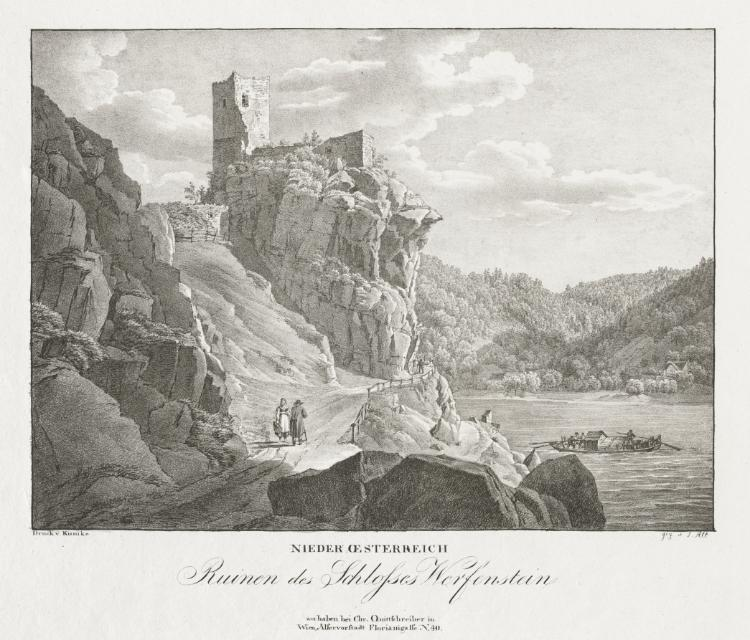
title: Nieder-oesterreich, Ruinen des Schlosses Werfenstein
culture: Austria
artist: Jakob Alt (Austrian, 1789–1872)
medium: lithograph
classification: Print